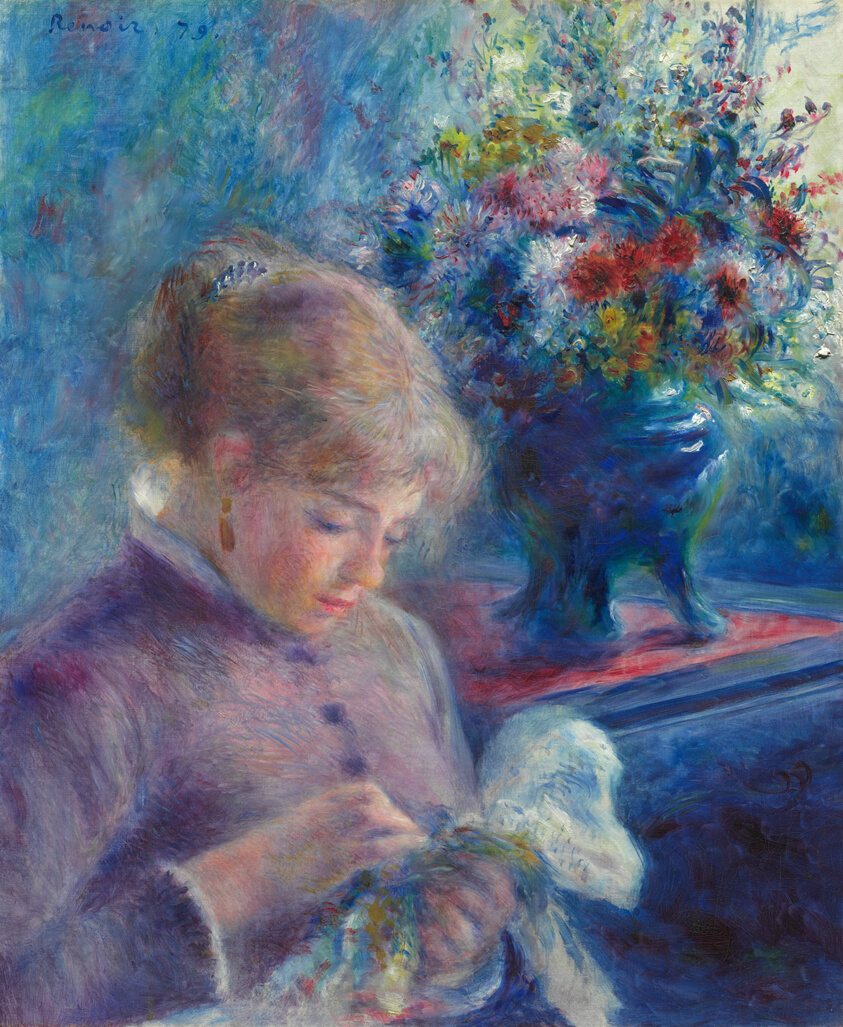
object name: Painting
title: Young Woman Sewing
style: Impressionism, nineteenth century, 19th century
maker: Pierre-Auguste Renoir (French, 1841–1919)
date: 1879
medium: Oil on canvas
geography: France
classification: painting; paint; oil paintings (visual works); oil on canvas; french; european painting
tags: sewing, vase, table, still life, labor, jewelry, interior, foliage, flowers, textile, red (color), blue, blue (color), purple (color), yellow (color), work, women, everyday life (genre), Century of Progress, world's fairs, Chicago World's Fairs